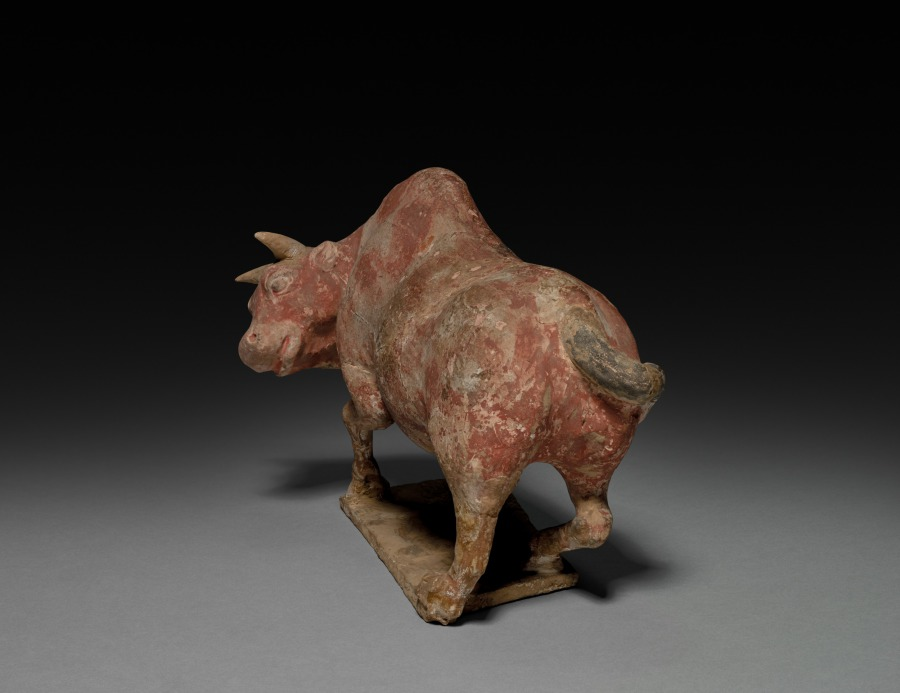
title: Bull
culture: China, Tang dynasty (618–907)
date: 618–907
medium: painted earthenware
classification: Ceramic